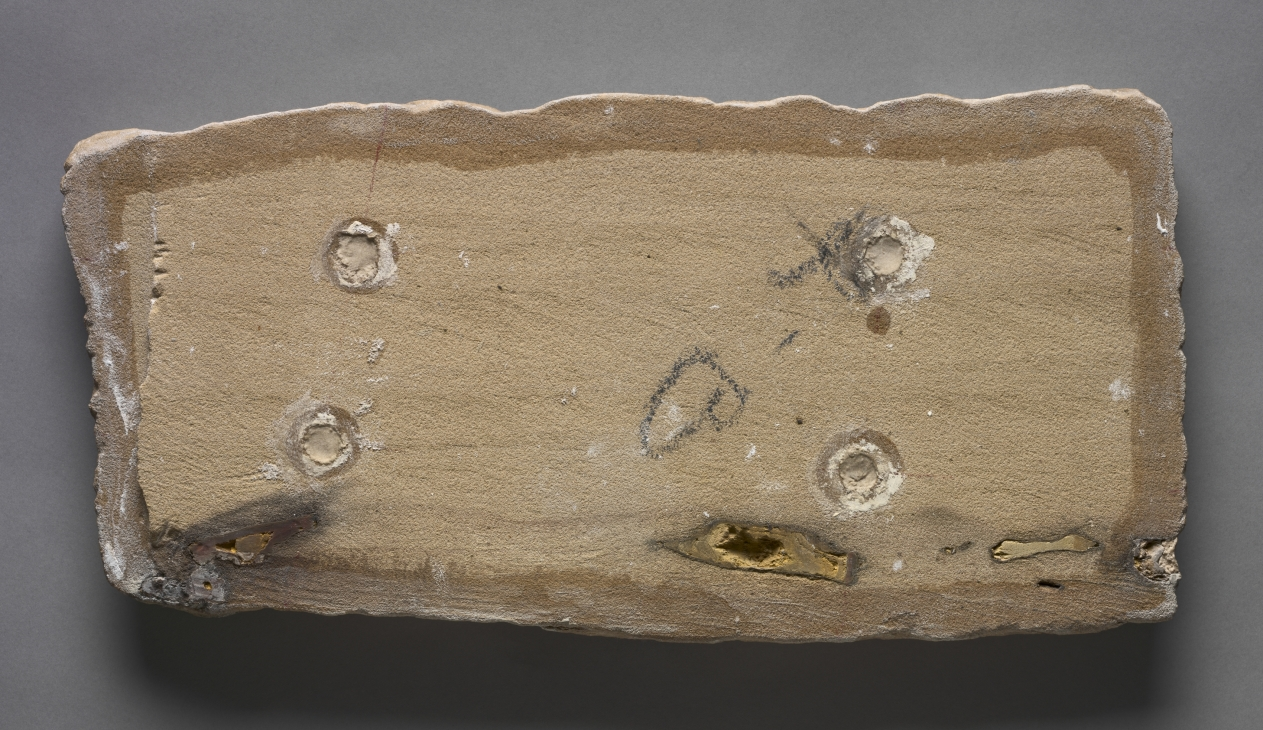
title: Talatat: Nefertiti Offers to the Aten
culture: Egypt, Karnak, New Kingdom (1540–1069 BCE), Dynasty 18, reign of Akhenaten (1351–1334 BCE)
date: 1353–1347 BCE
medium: painted sandstone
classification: Sculpture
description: The son of Amenhotep III, Akenaten, brought about the short-lived "monotheistic" revolution in Egyptian religion near the end of Dynasty 18. The young king constructed a temple complex to the Aten, the Sun Disk, at Karnak—where this relief originated—before he moved his capital to El Amarna. For reasons unknown, the figure of the Queen Nefertiti appears in these reliefs far more often than that of the king. Ironically, the Aten temples were dismantled to be used as foundations and fill for adaptations to the Great Temple of Amun, whom the Aten had briefly displaced.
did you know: Just in front of her nostril is the ankh or symbol of life, being given to her by Aten the sun, so that she may breathe in the god's gift of life.